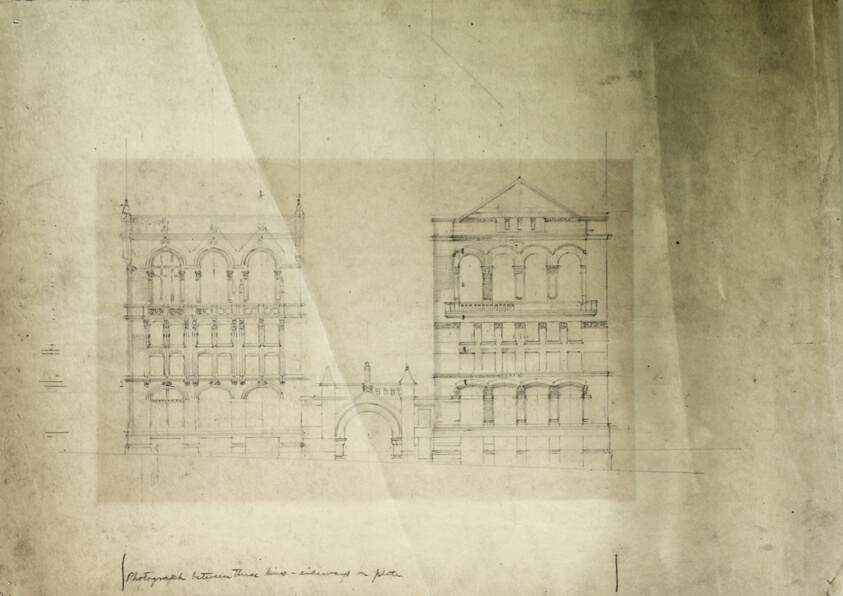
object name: Architectural Drawing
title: Board of Trade Building, Kansas City, Missouri, Front Elevation Study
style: 19th century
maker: Burnham & Root; American, 1873–1891; John Wellborn Root; American, 1850–1891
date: c. 1887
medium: Graphite on tan drawing paper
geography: Kansas City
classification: architectural drawing; design drawing; architecture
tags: Missouri, architecture, office buildings